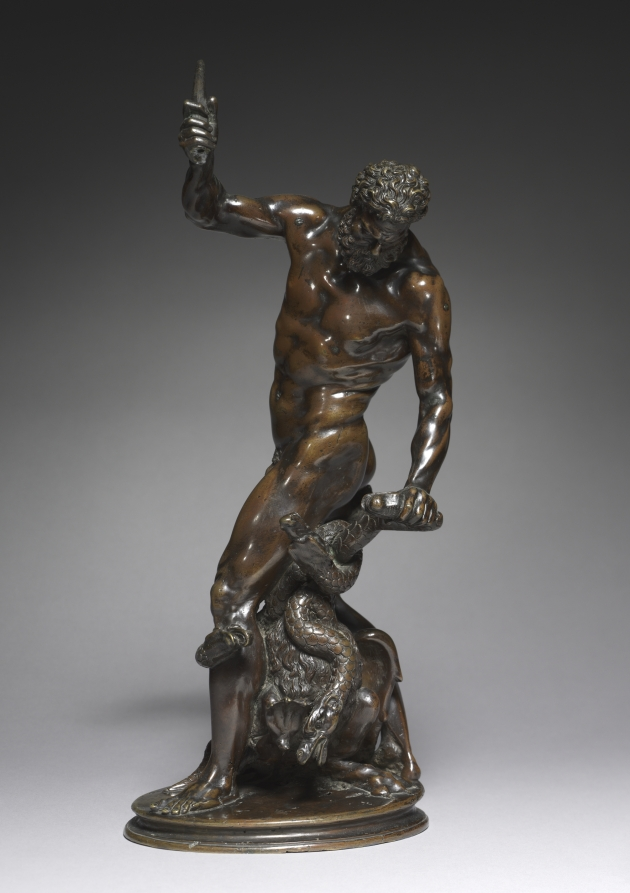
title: Hercules and the Hydra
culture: Northern Europe, late 16th-early 17th century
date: late 1500s-early 1600s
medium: bronze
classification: Sculpture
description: Hercules slayed the Lernean Hydra as the second of the ancient hero’s twelve labors. When one of the nine snake-like heads was destroyed, two grew back. Hercules cauterized each stump, allowing him eventually to kill the monster. The object he holds may have been a club, sword, sickle, or torch. The sinuous, scaly Hydra and the defined musculature presented challenging opportunities for sculptors working in bronze. The raw, tumultuous energy and twisting form-associated with artists of the late 1500s-contrasts to Jacopo Sansovino’s earlier Virgin and Child (1951.316).